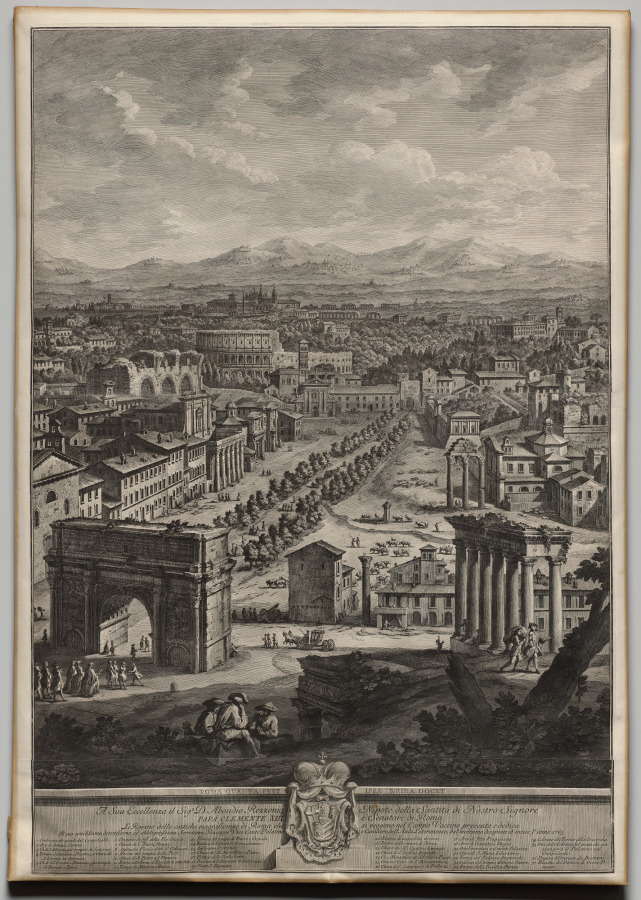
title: The Campo Vaccino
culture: Italy, 18th century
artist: Giuseppe Vasi (Italian, 1710–1782)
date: 1765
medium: engraving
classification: Print